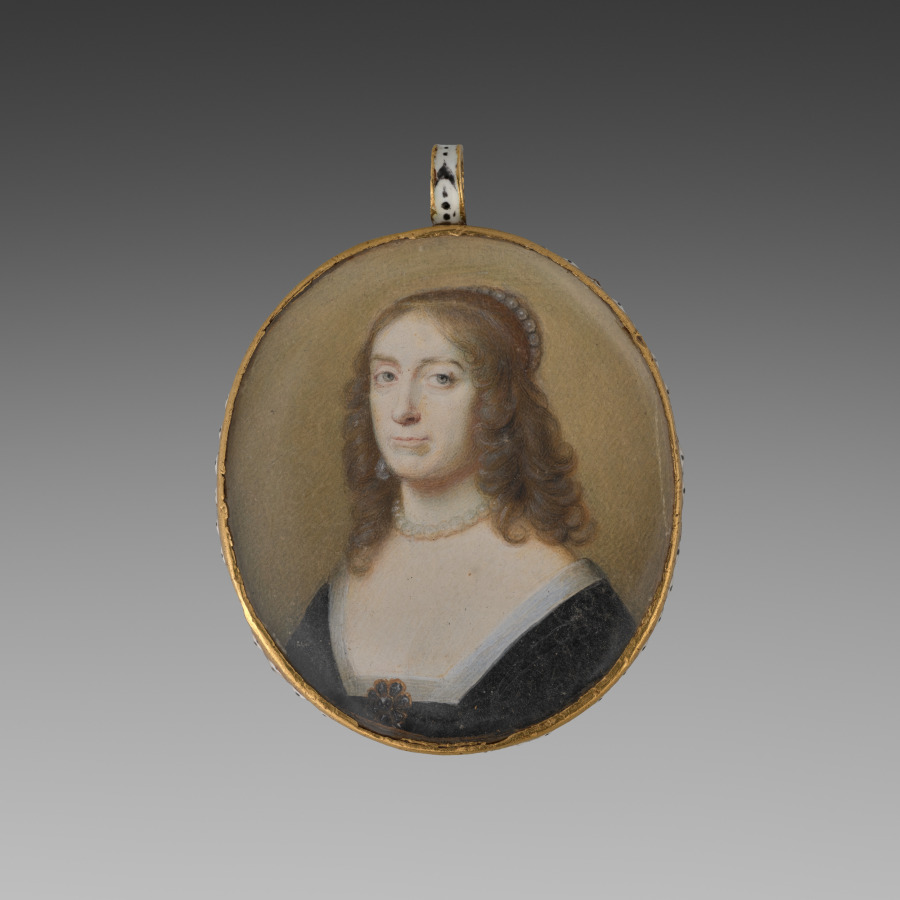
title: Portrait of Elizabeth Stuart, Electress Palatine and Queen of Bohemia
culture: England, 17th century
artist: Alexander Cooper (British, 1609-c. 1658)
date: 1630s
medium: watercolor on vellum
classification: Portrait Miniature